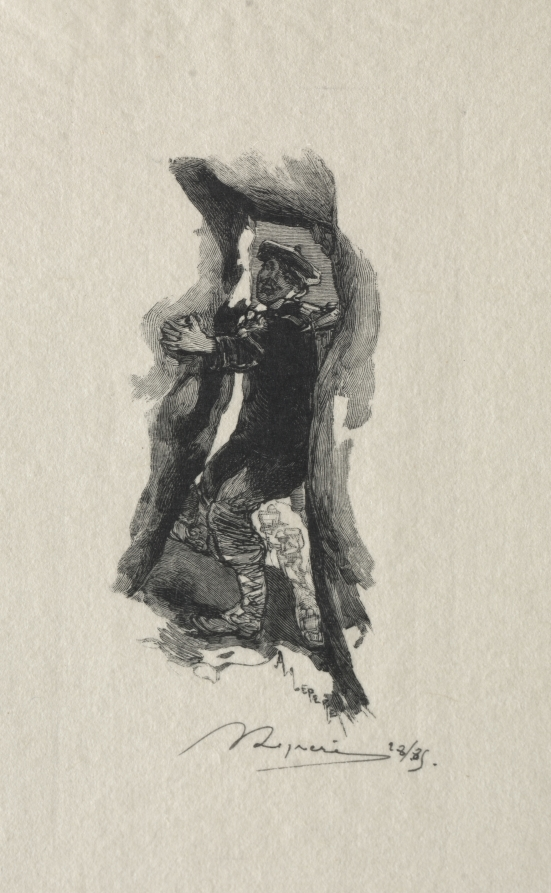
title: Au defile de Sept-Cavernes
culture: France, 19th-20th century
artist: Auguste Louis Lepère (French, 1849–1918)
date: 1890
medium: wood engraving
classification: Print